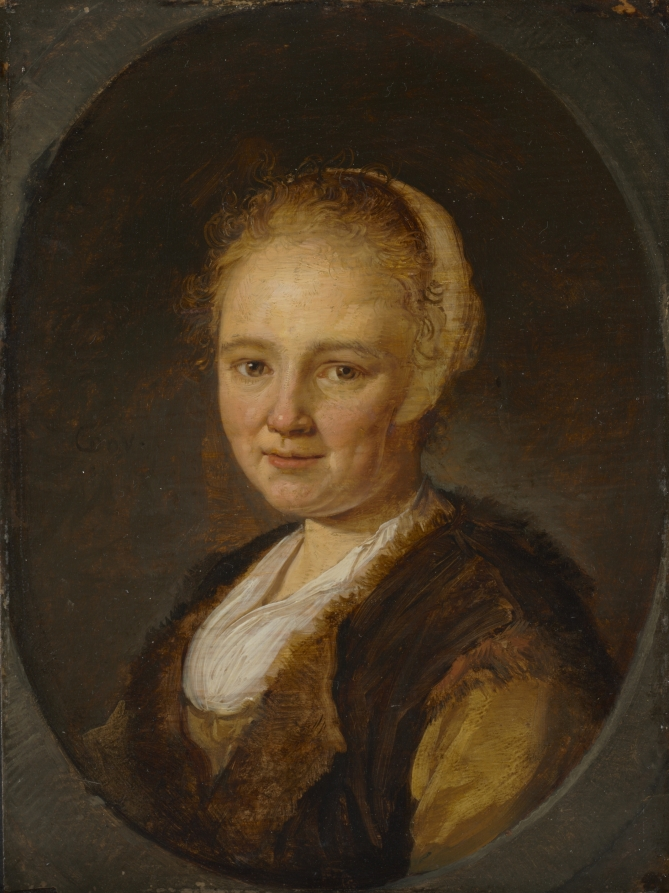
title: A Young Woman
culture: Netherlands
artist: Gerrit Dou (Dutch, 1613–1675)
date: 1640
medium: oil on wood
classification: Painting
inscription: Signed left center: "GDov."; "[GD in monogram]"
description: This painting may depict a specific person as in a traditional portrait. The less formal costume and the tight focus on the head, however, may mean that it is a tronie, a popular category of painting among Dutch painters in the 1600s. While painted from living models, tronies represent more general types of people, designed as beautiful images rather than accurate likenesses of people known to their patrons.